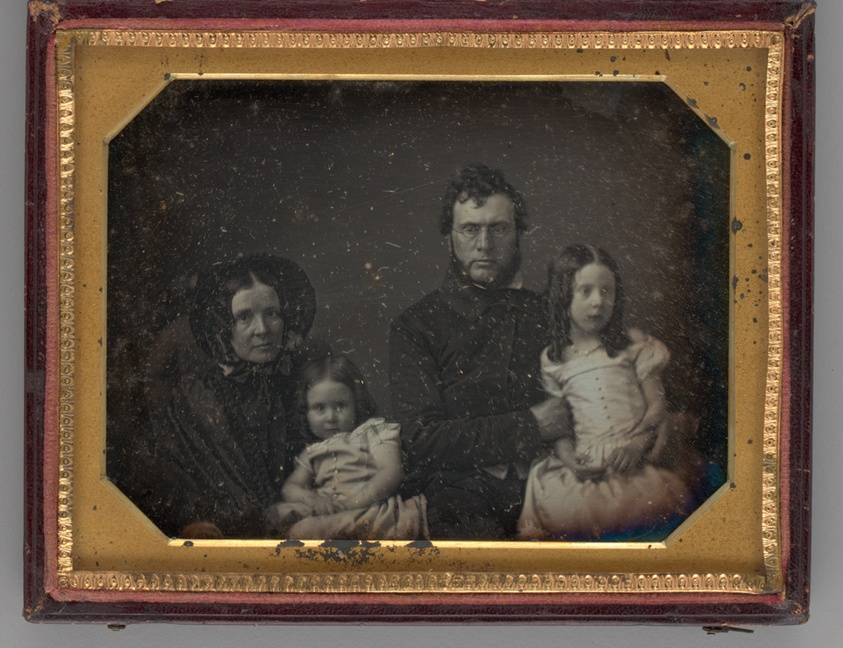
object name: Photograph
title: Untitled (Portrait of a Man, Woman and Two Girls)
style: 19th century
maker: Unknown maker; American, 19th century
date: 1847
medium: Daguerreotype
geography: United States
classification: portrait; photograph; photographic process; photography; portrait; daguerreotype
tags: lundberg collection, portraits, portraits: child subject, children, families, family, female, Male